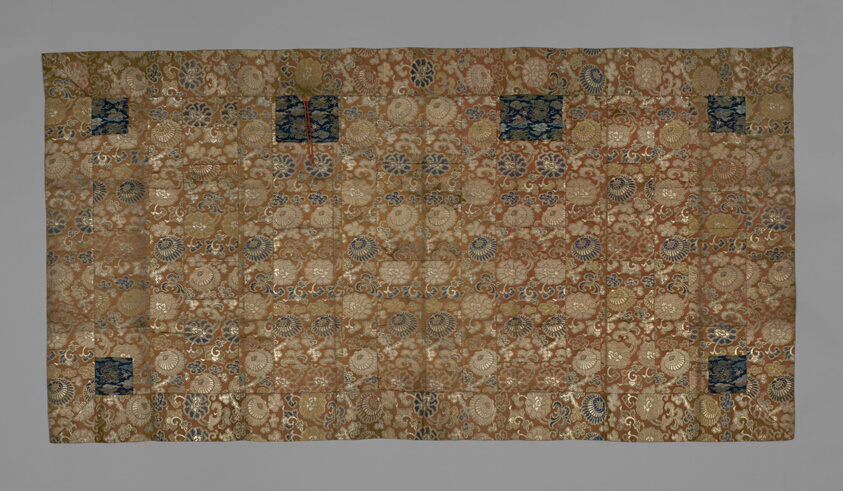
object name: Textile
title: Kesa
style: edo (japanese period), Japanism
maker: Japan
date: late Edo period (1789–1868), late 18th/early 19th century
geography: Japan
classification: textile; costume; liturgical - buddhist; weaving